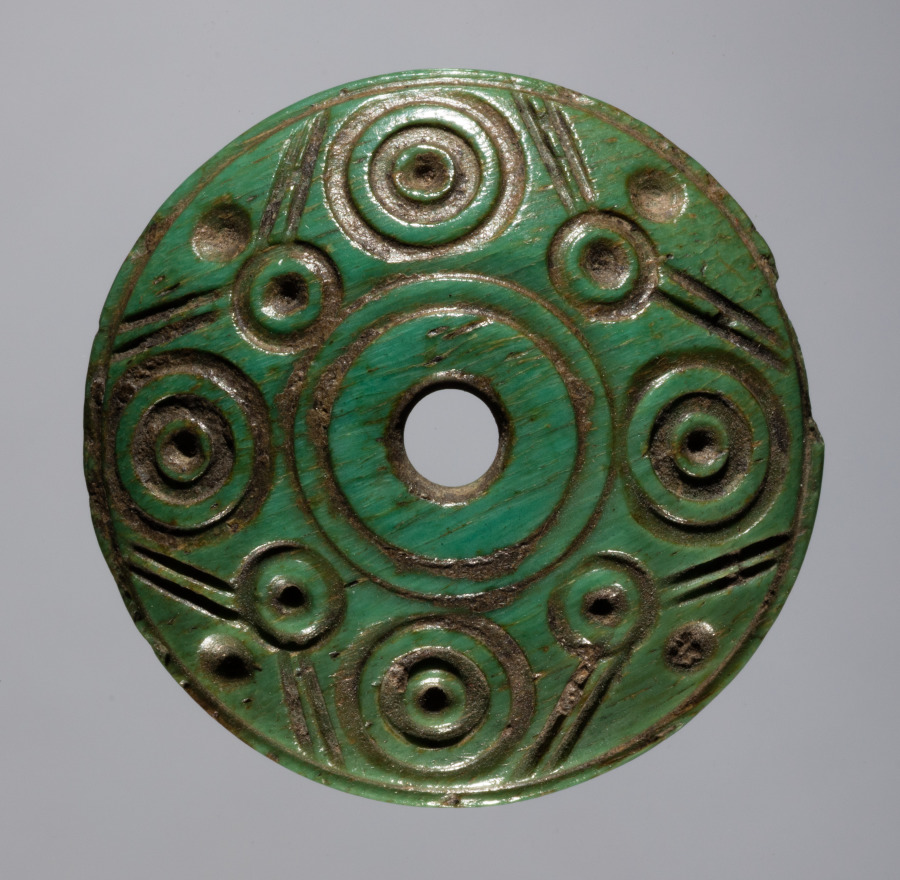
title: Spindle Whorl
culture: Iran, early Islamic period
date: 700s - 900s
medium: bone, incised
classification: Spindle Whorl